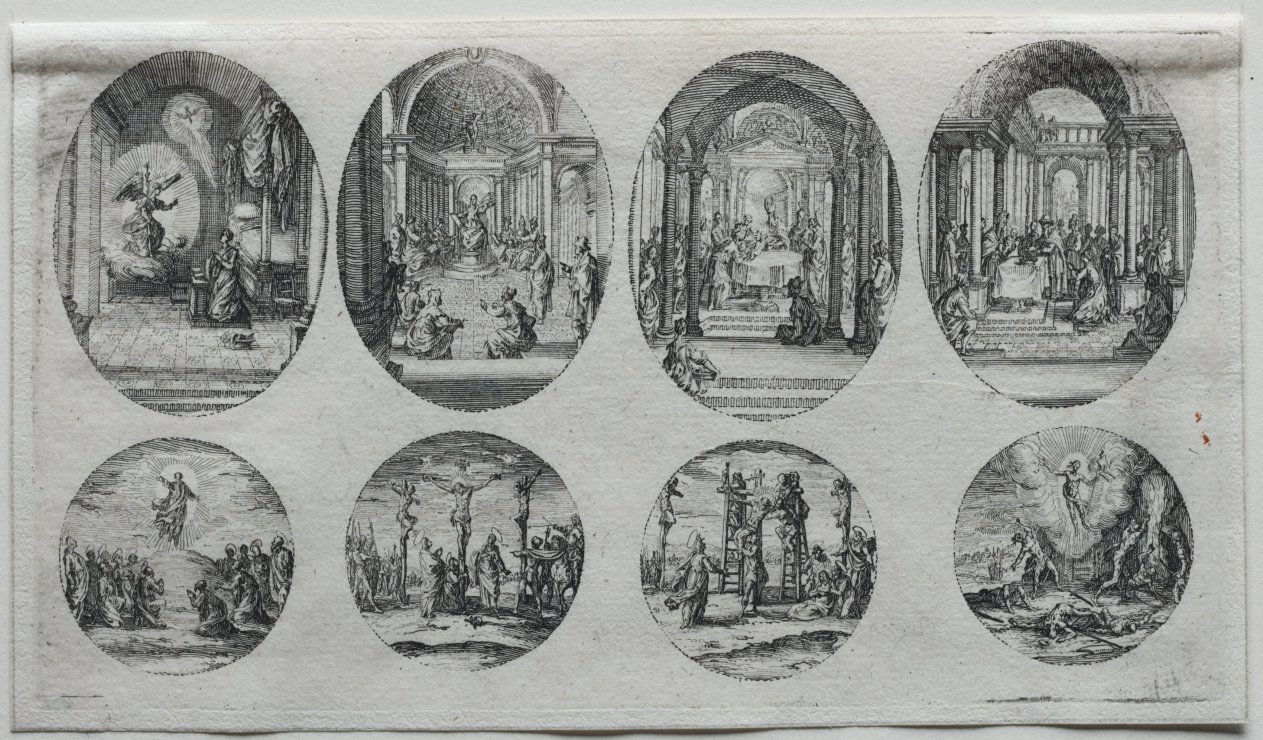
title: The Mysteries of the Passion: The Circumcision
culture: France, 17th century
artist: Jacques Callot (French, 1592–1635)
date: 1631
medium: etching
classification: Print